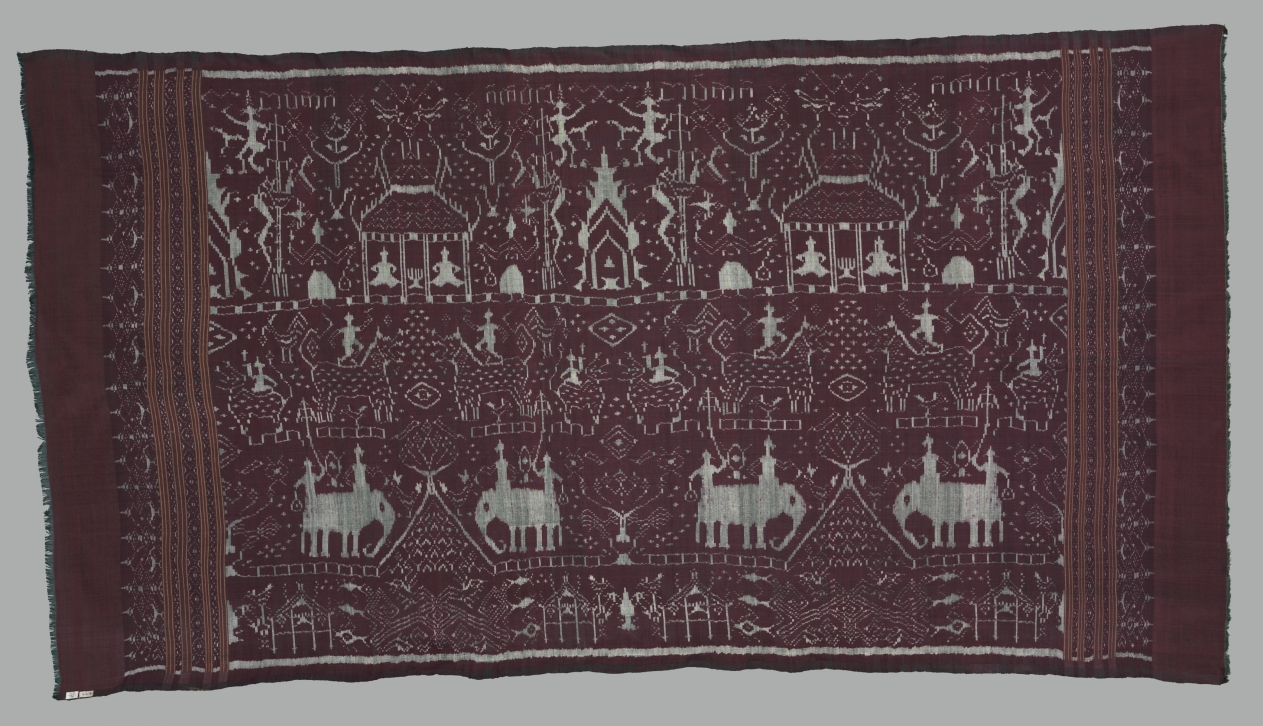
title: Sarong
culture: Cambodia, 20th century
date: 1900's before 1931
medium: silk, Ikat, twill weave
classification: Textile